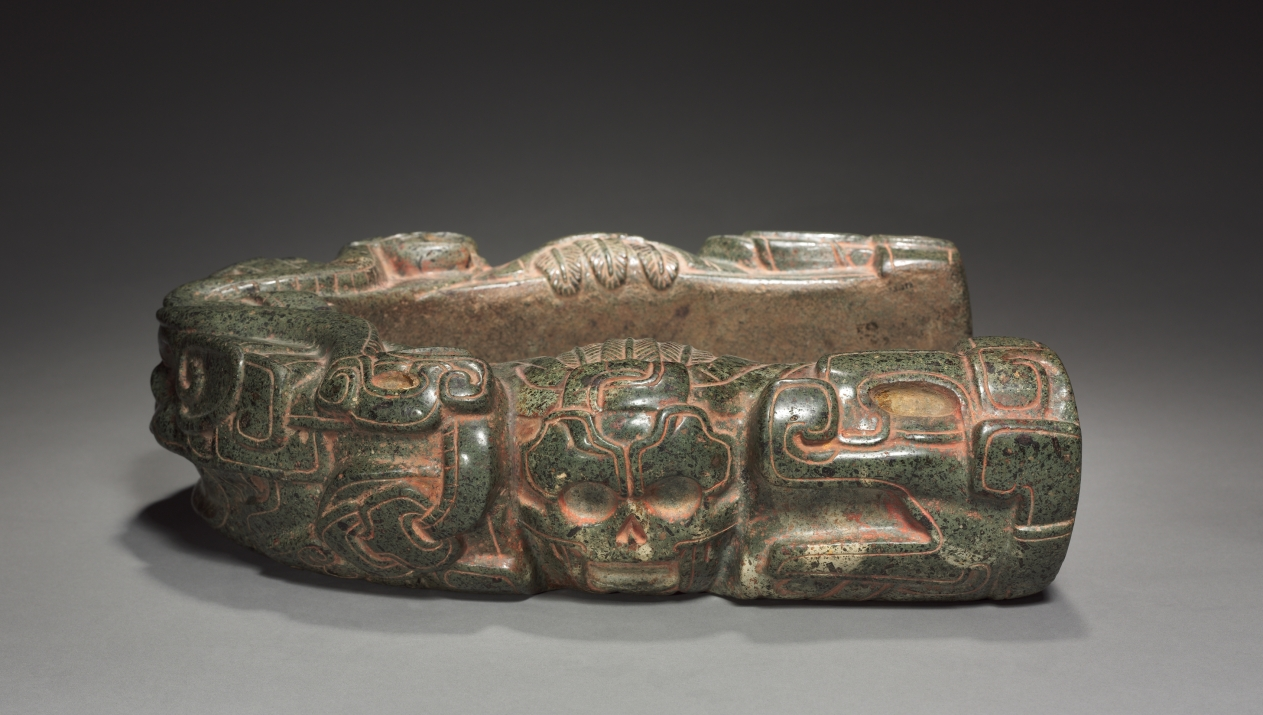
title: Ballgame Hip Protector (Yoke)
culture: Mexico, Gulf Coast, Classic Veracruz style (600-1100)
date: 600–900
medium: greenstone, pigment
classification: Sculpture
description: U-shaped ballgame sculptures imitate the shape of belt-like protectors, perhaps made of wood and padding, worn to shield ballplayers from injury when they returned the solid rubber ball from their hips. This fine example embodies a major theme of the ballgame: the connection between fertility and death. It is made of greenstone, a precious material that through its color symbolizes the lush burgeoning of nature after the rainy season. The imagery, however, is menacing: a monstrous head snarls from the curve, and human skulls appear on the sides.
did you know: The ballgame was a team sport played on specially constructed rectangular courts and involved striking a large solid rubber ball without using your hands.